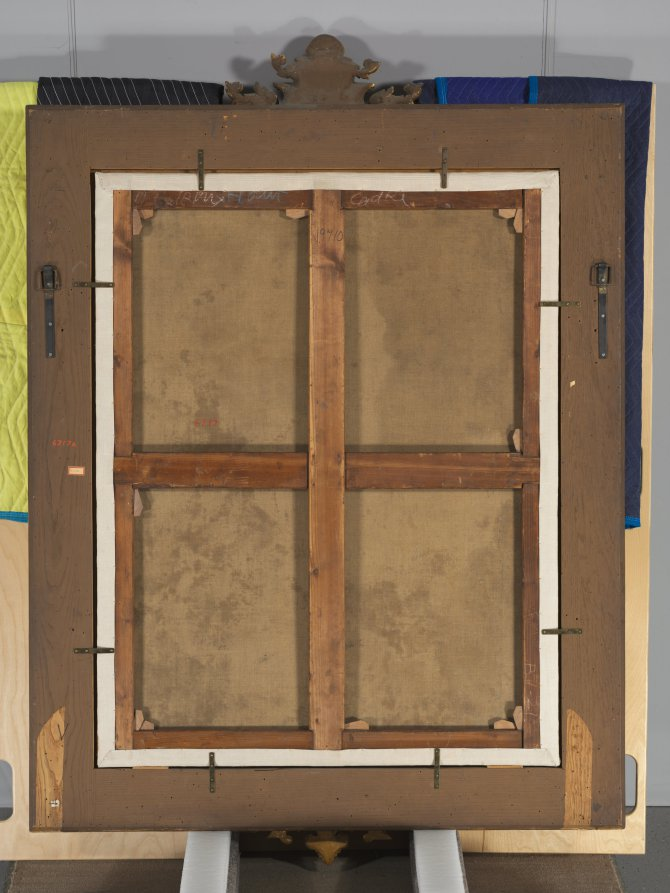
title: Portrait of Cardinal Guillaume Dubois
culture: France, 18th century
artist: Hyacinthe Rigaud (French, 1659–1743)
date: 1723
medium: oil on canvas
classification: Painting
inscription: signed on base of clock: fait par Hyacinthus Rigaud, 1723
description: With his luxurious, flamboyant dress—a voluminous wrap of scarlet silk topped by a short fur cape—the subject of Hyacinthe Rigaud’s portrait was clearly a man of consequence. Guillaume Dubois gained the favor of Louis XIV as tutor to his nephew, Philippe Charles, Duke of Orléans, and served as chief minister under Louis’s successors, the regent Duke of Orléans and Louis’s great-grandson, Louis XV. Dubois was appointed a Cardinal in the Catholic Church in 1721, a lofty aspiration at least partly motivated by political ambition: the title gave him the ability to remove political adversaries with impunity. Dubois holds a letter with the words Au Roy (to the king); this portrait was painted in the same year the young Louis XV ascended to the throne.